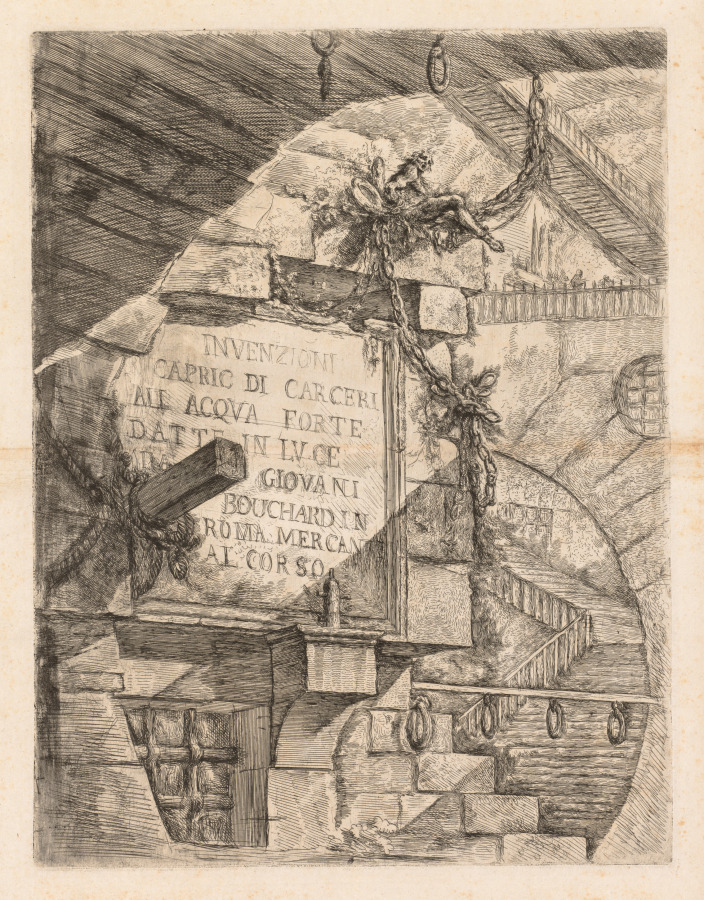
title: The Prisons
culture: Italy, 18th century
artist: Giovanni Battista Piranesi (Italian, 1720–1778)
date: 1745–1750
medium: etching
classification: Print